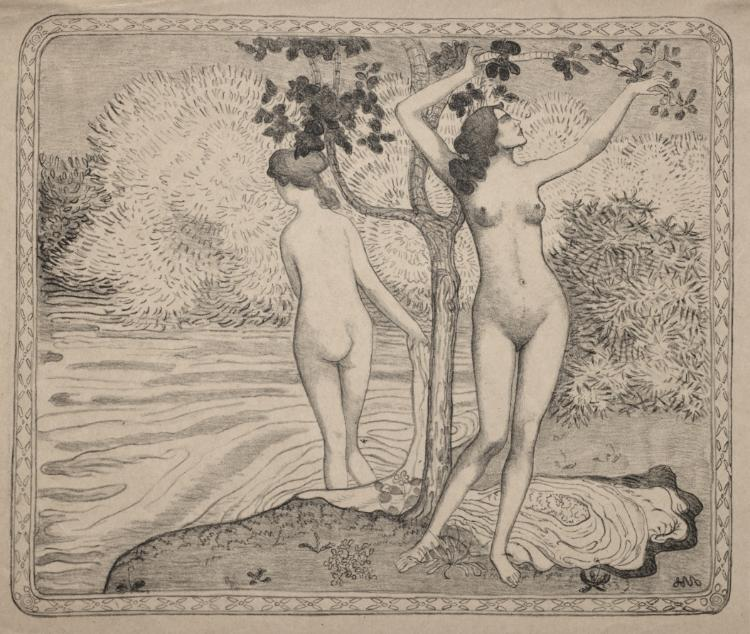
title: Two Bathers under a Tree at the Water's Edge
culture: France, late 19th Century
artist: Aristide Maillol (French, 1861–1944)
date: 1895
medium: lithograph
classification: Print